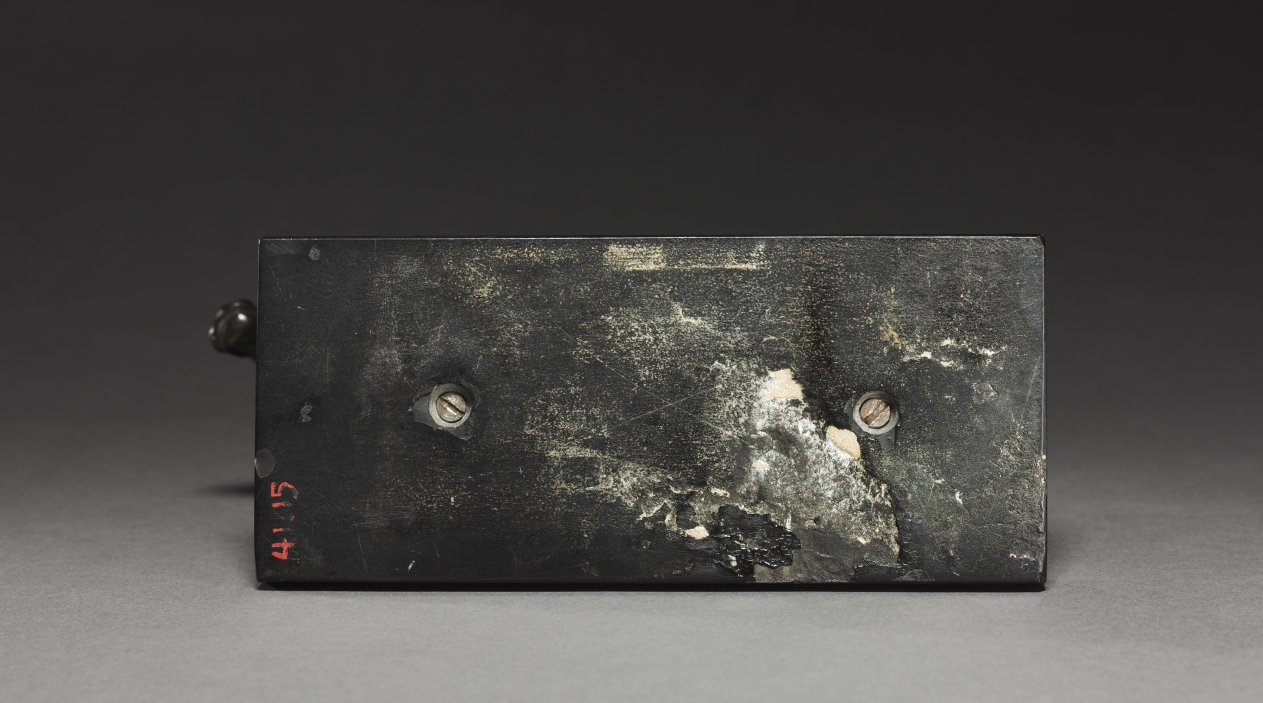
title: Deer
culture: France, 19th century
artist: imitator of Antoine-Louis Barye (French, 1796–1875)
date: after 1830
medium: bronze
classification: Sculpture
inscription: Signed: "Barye"